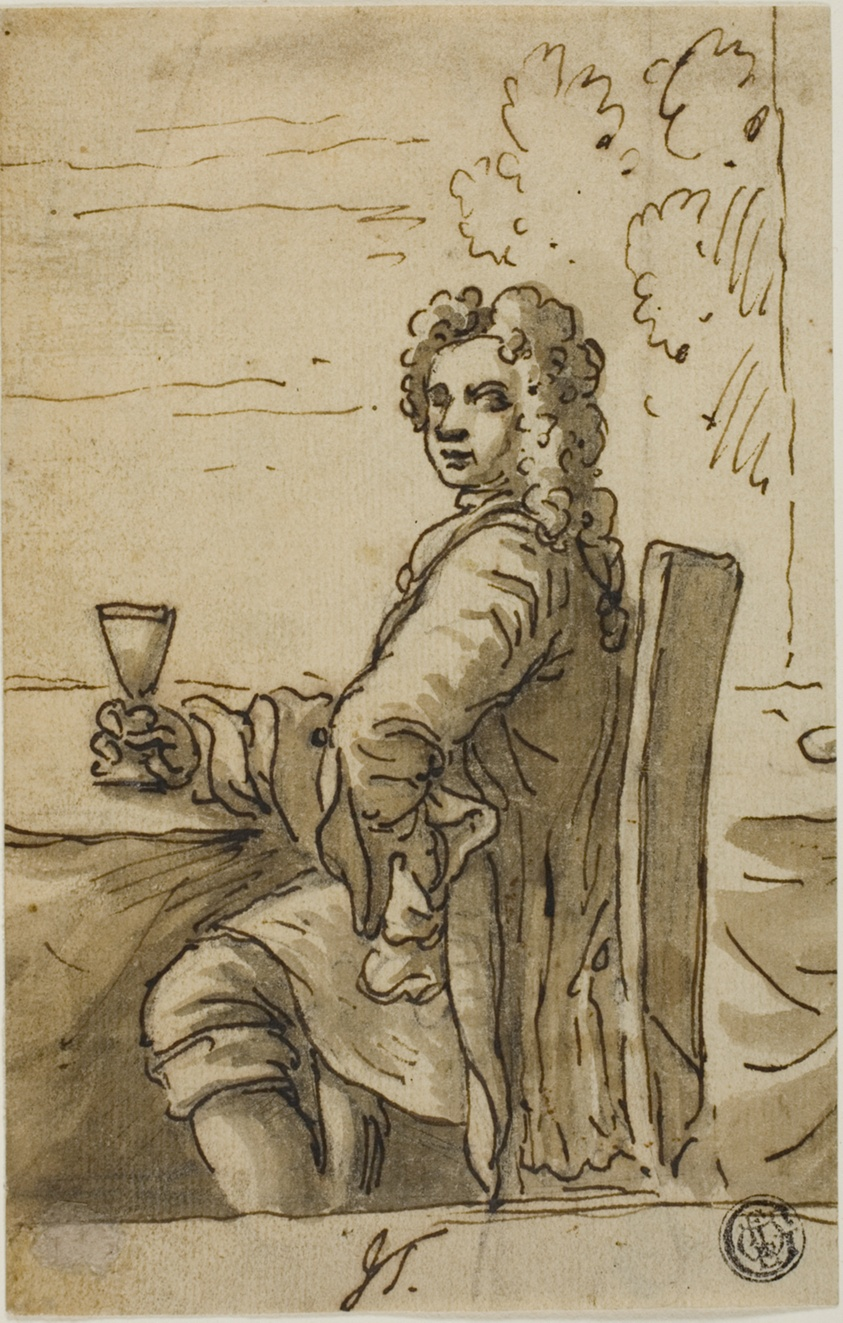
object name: Drawing and Watercolor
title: Sir J. Thorndale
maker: James Thornhill (English, 1675-1734)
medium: Pen and brown ink with brush and brown wash, over graphite, on cream laid paper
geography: England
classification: pen and ink drawings; drawings (visual works); prints and drawing